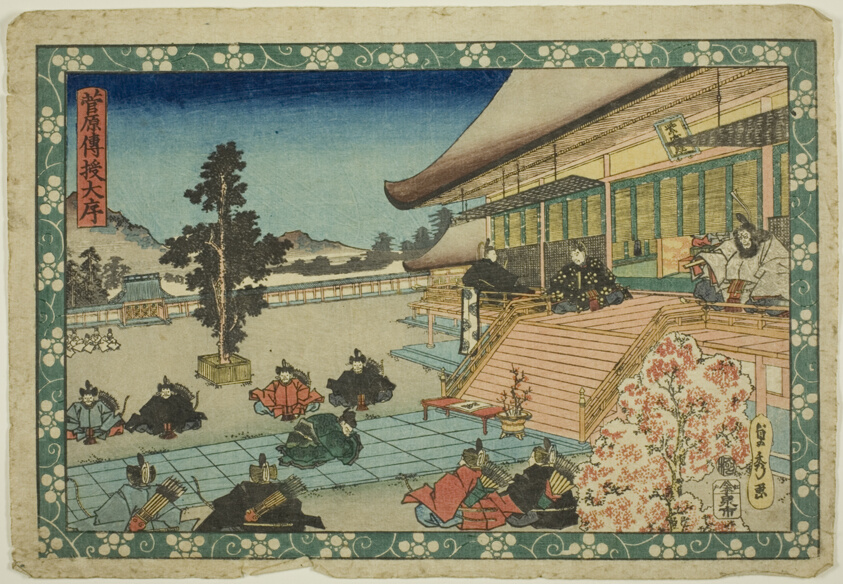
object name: Print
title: The Opening Scene (Daijo), from the series "Sugawara's Secrets (Sugawara denju)"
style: Japanese (culture or style)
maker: Utagawa Sadahide (Japanese, 1807-1873)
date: c. 1830/44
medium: Color woodblock print; oban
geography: Japan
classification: print; asian art